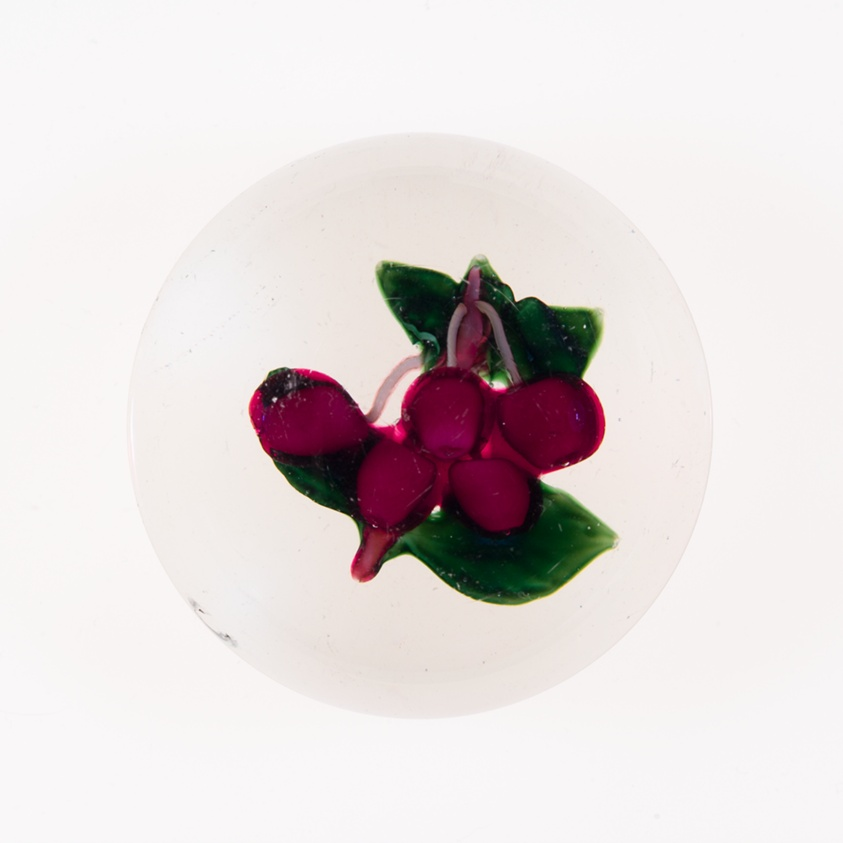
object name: Glass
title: Paperweight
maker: Saint-Louis Glassworks (Cristalleries de Saint-Louis); Lorraine, France, founded 1586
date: 19th century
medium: Glass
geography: Saint-Louis-lès-Bitche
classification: paperweight; lampwork; european decorative arts; glass